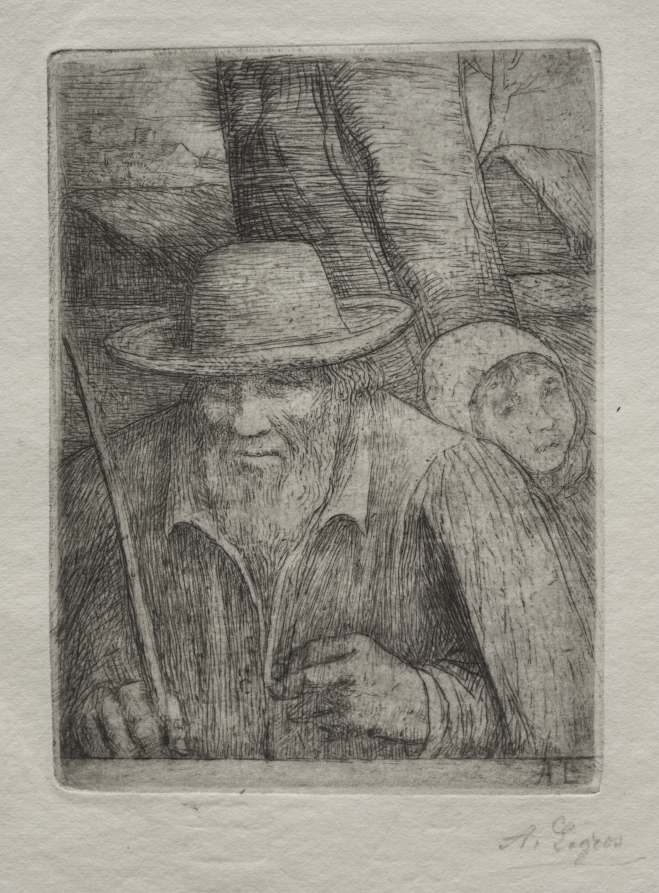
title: The Farmer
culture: France, 19th-20th century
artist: Alphonse Legros (French, 1837–1911)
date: c. 1857–1911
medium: etching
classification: Print